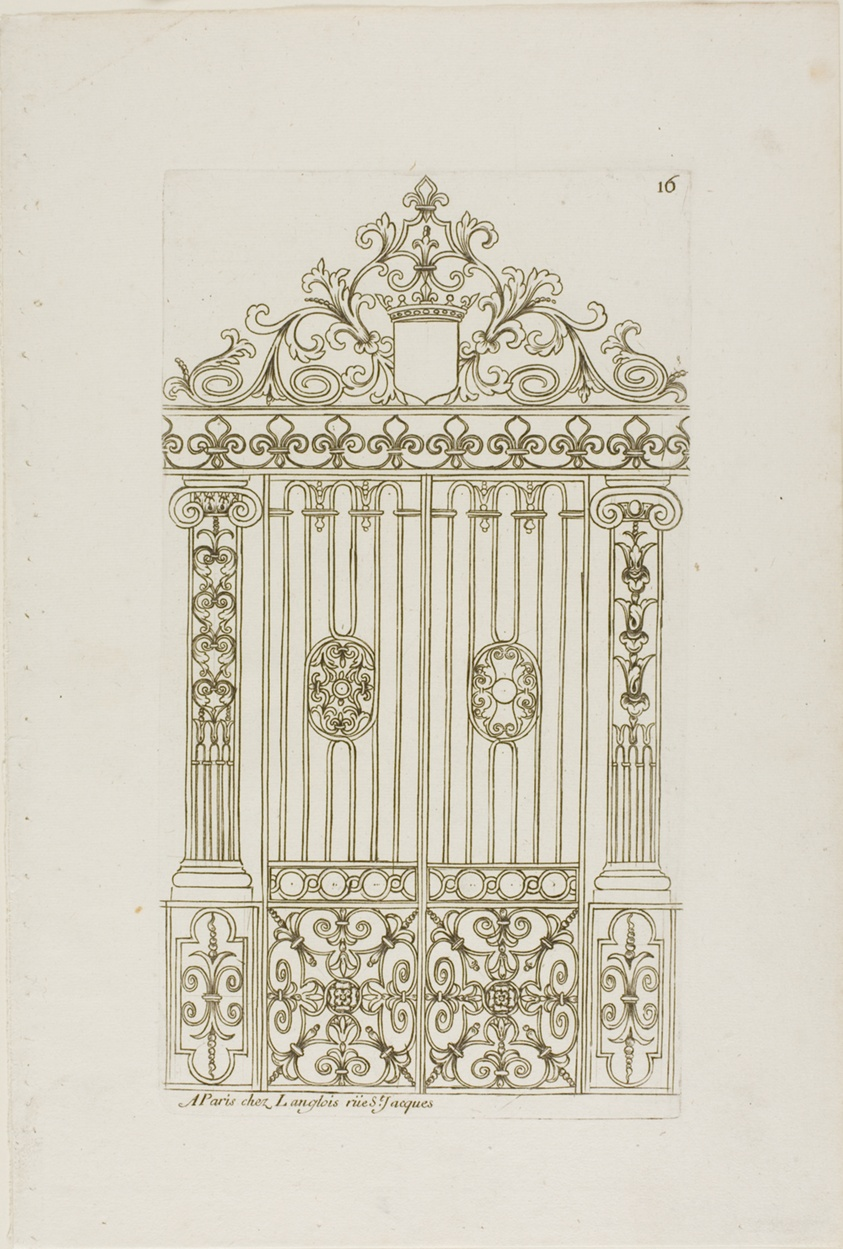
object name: Print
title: Designs for Locksmiths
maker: Jean Bérain I (French, 1640-1711); after Hugues Bris e Ville (French)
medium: Etching on paper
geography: France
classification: etching; print; prints and drawing